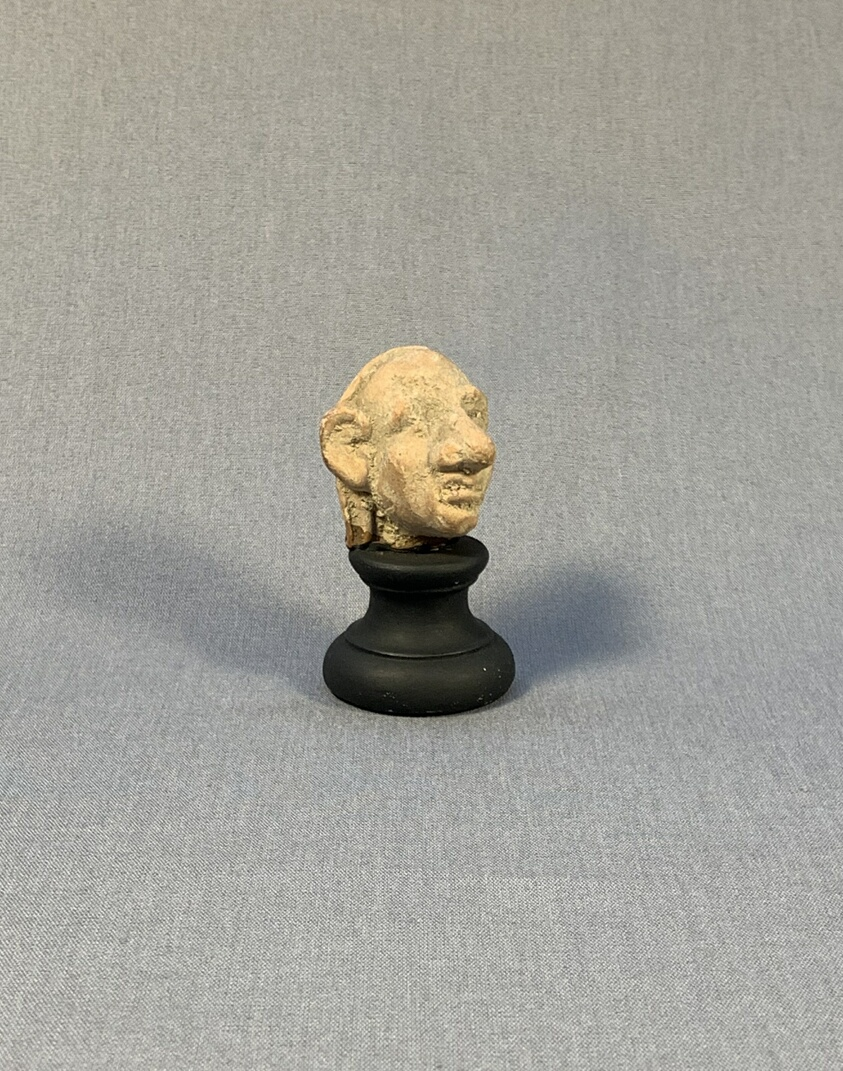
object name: Sculpture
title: Head of a Man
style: greek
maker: Greek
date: 2nd-1st century BCE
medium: terracotta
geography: Greece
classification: earthenware; ceramics; sculpture; ancient art